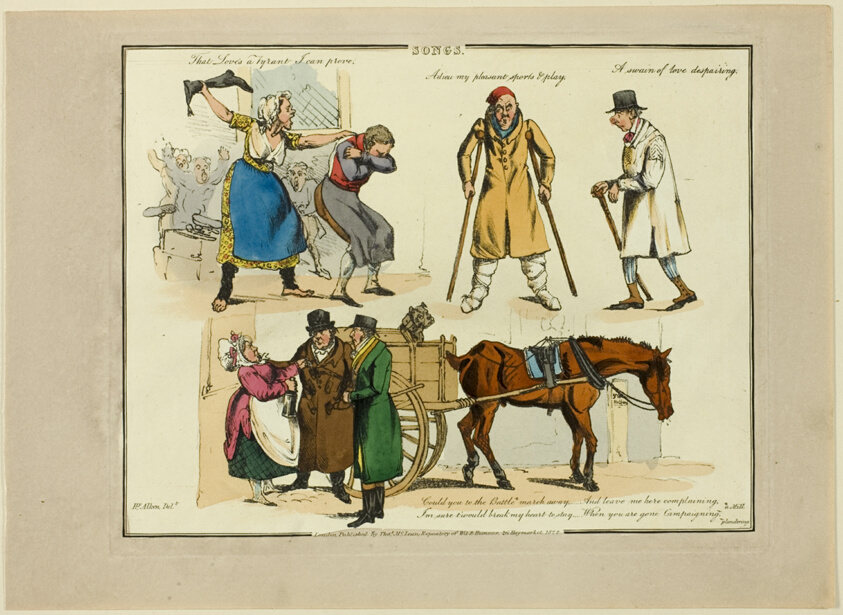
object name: Print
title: Plate from Illustrations to Popular Songs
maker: Henry Alken (English, 1785-1851); published by Thomas McLean (English, active 1790-1860)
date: 1822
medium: Soft ground etching with hand-coloring and aquatint on paper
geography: England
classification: etching; print; prints and drawing